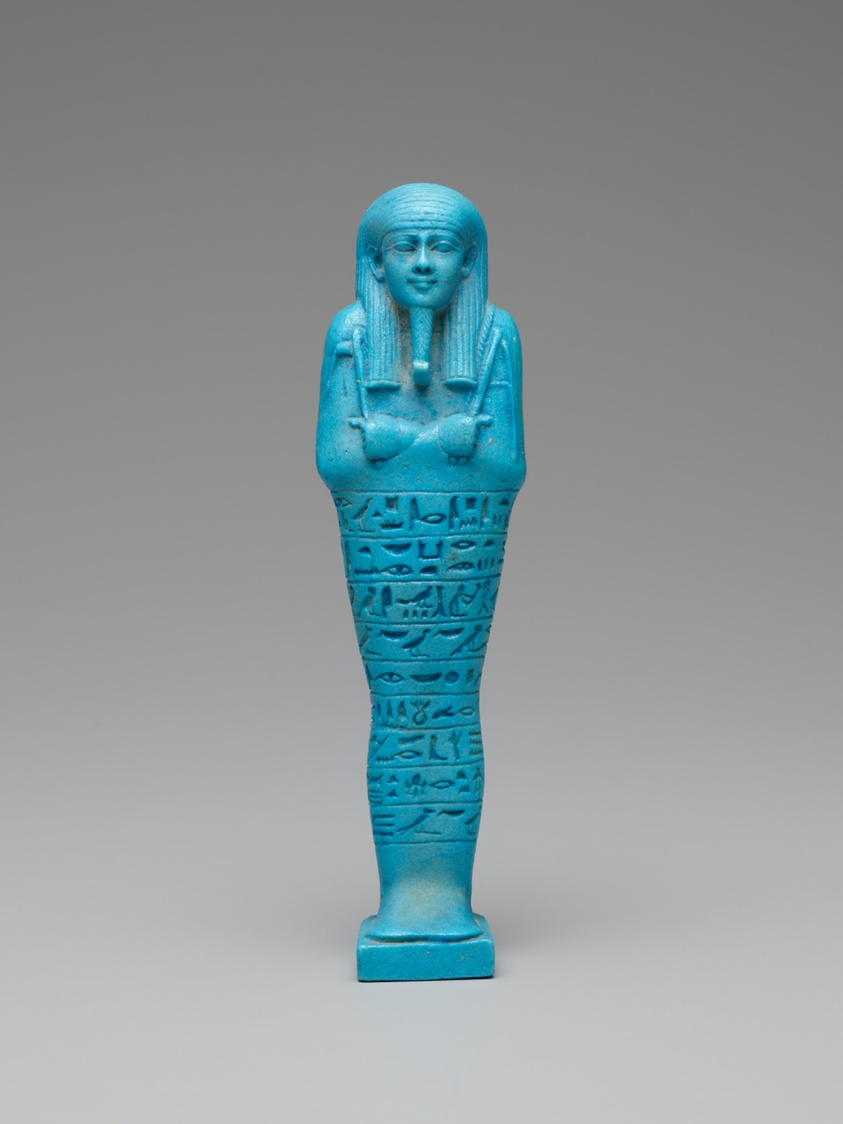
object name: Funerary Object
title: Ushabti (Funerary Figurine) of Psamtek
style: late period (egyptian), ancient, egyptian, twenty-sixth dynasty, saite period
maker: Egyptian; probably Saqqara, Egypt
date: Late Period, Dynasty 26, reign of Amasis (570–526 BCE)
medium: Faience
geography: Egypt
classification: ushabti; glass; funerary; figurine; ancient art; faïence (composite material)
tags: funerary art